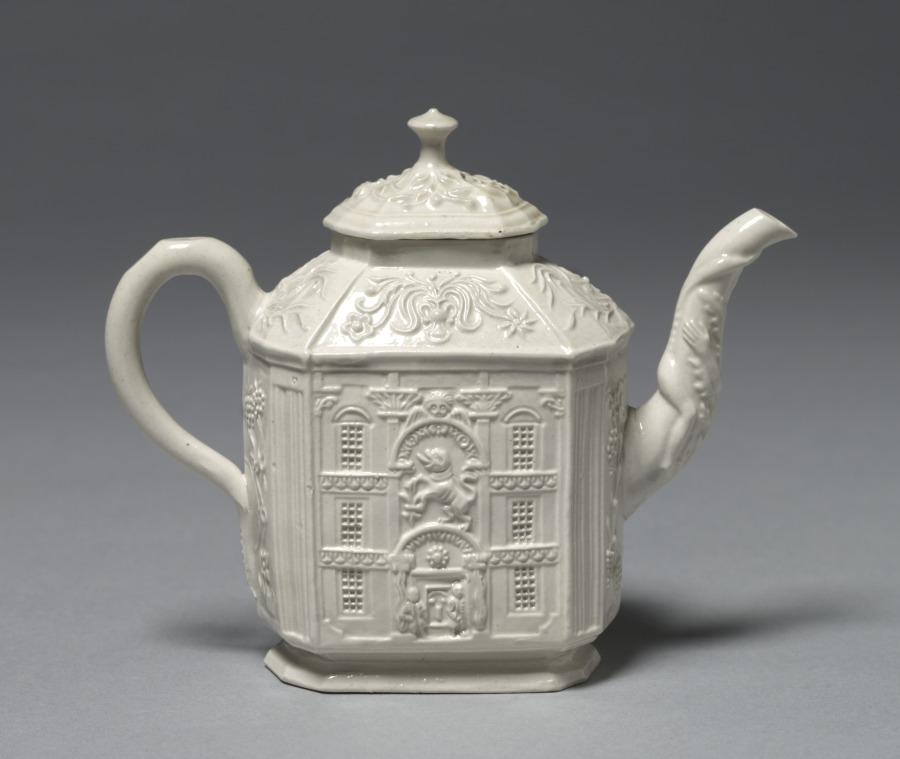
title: Teapot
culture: England, Staffordshire, 18th century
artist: Staffordshire Factory (British)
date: c. 1745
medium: salt-glaze earthenware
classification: Ceramic